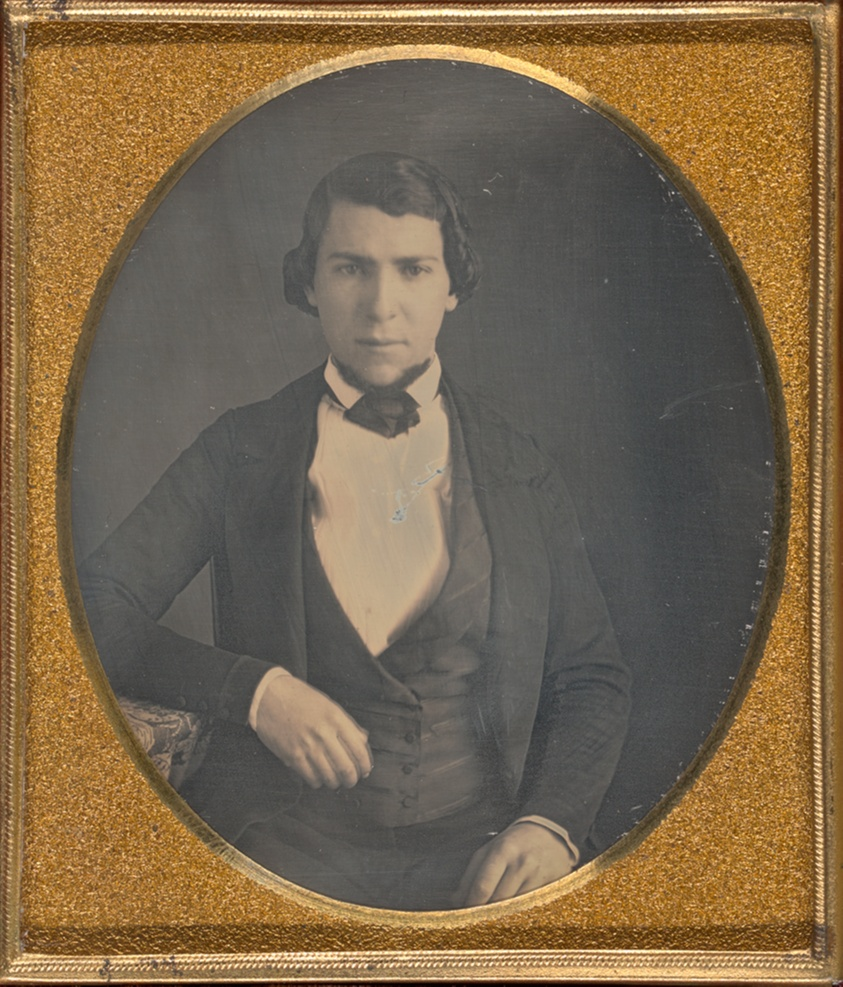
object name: Photograph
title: Untitled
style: 19th century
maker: Artist unknown; 19th century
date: 1839/60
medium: Daguerreotype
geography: Unknown Place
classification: daguerreotype; photographic process; photography; photograph